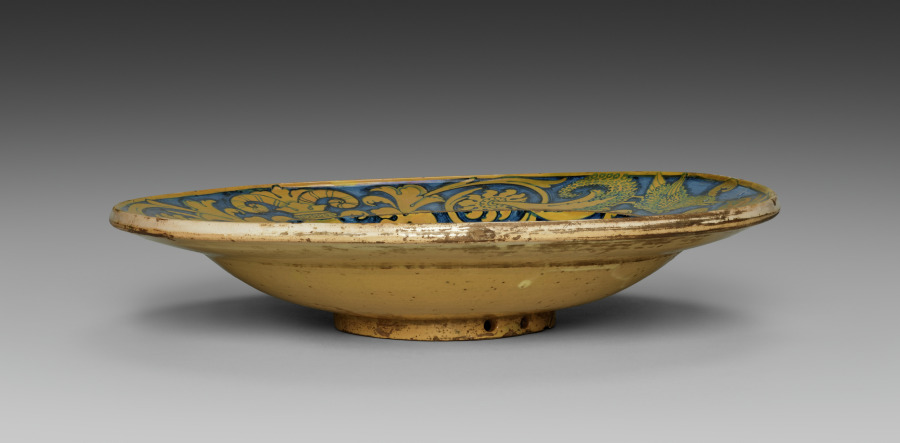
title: Plate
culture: Italy, Deruta, 16th century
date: c. 1520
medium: tin-glazed earthenware (maiolica)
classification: Ceramic